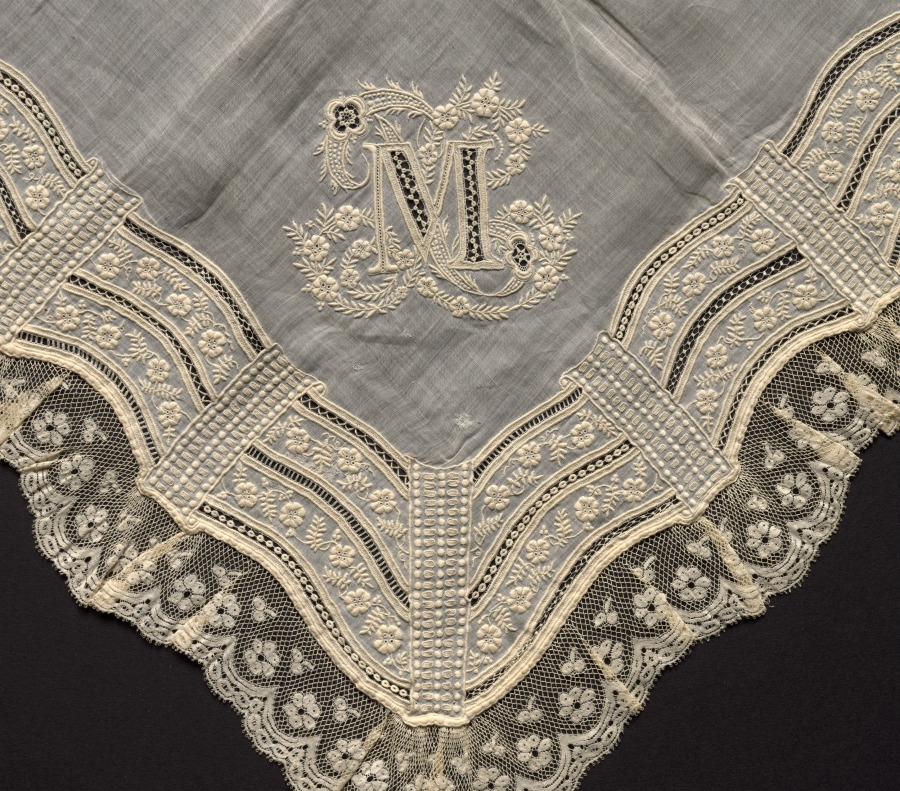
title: Lace Handkerchief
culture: France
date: 1800s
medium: linen ground: embroidery, lace edging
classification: Embroidery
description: The initial M is embroidered in one corner of this handkerchief.